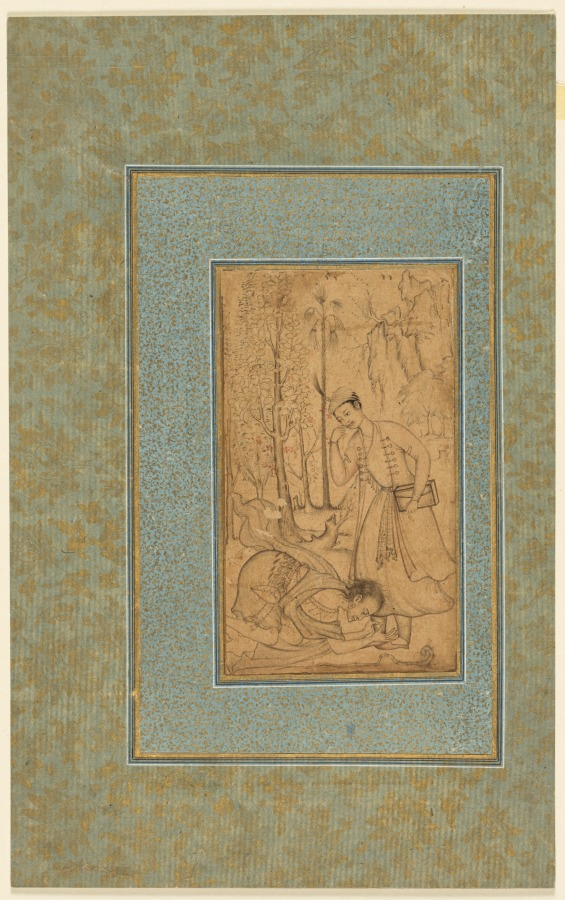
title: A holy man prostrating himself before a learned prince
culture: Mughal India, court of Akbar (reigned 1556–1605)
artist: attributed to Manohar (Indian, active late 1500s)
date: c. 1585; border added probably 1700s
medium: ink on paper, laid down with borders of gold-decorated blue paper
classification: Painting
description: Manohar riffs on the work of his father, Basavana, by showing a holy man bowing at the feet of a prince, instead of another holy man. Those who could recognize the relationship between this work and that of his father (CMA 2013.296) would impress gatherings of courtly connoisseurs, who prided themselves on being able to identify the hand of individual artists just by looking at the paintings. Recitation of poetry would accompany the viewing of paintings and drawings. Virtuoso artists reflected glory on their patrons. As an Islamic ruler, Akbar and his court participated in these activities—a new purpose for art that Indian artists had to learn.